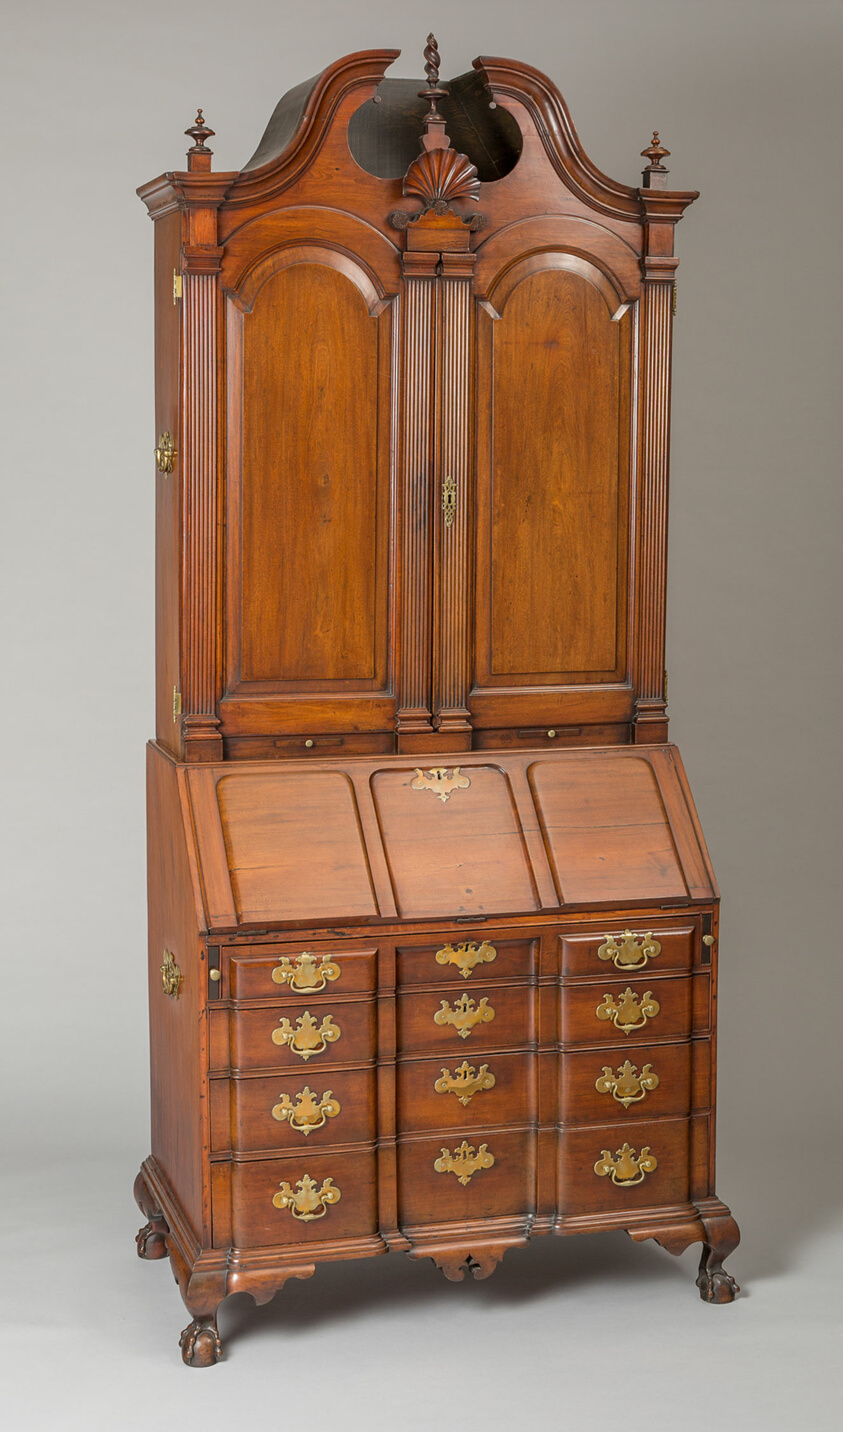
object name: Furniture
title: Desk and Bookcase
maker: Artist unknown (American, 18th century); Salem, Massachusetts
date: 1760–70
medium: Mahogany and white pine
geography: Salem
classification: desk; furniture; american decorative arts; american arts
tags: furniture